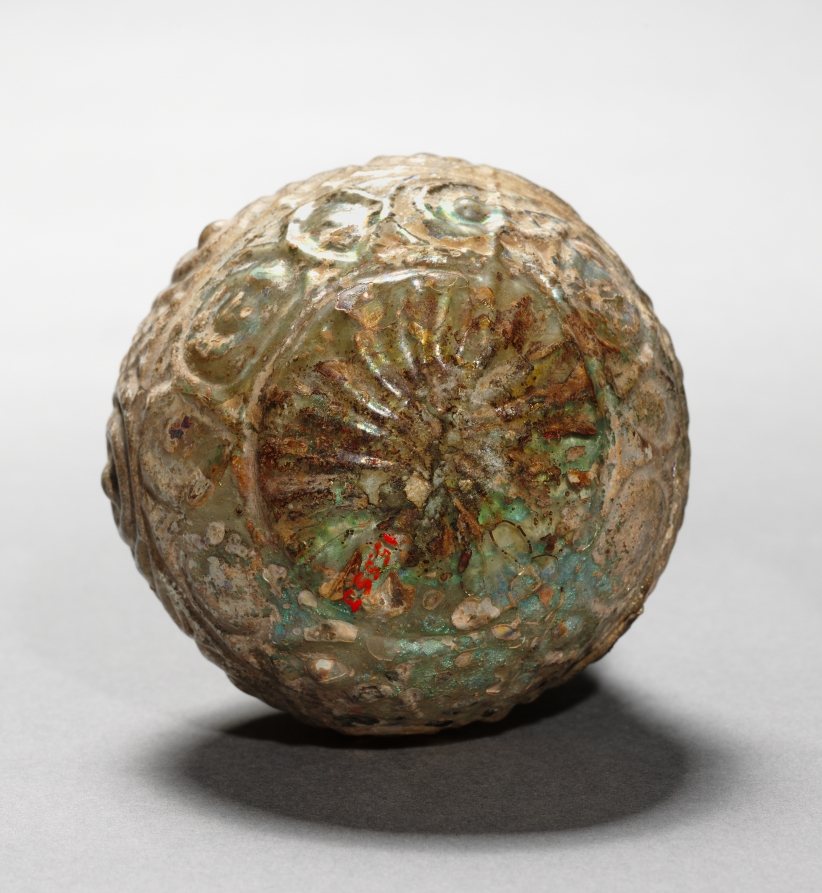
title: Pitcher with Handle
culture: Roman, Syro-Palestinian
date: 300s CE or later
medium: glass, mold-blown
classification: Glass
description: Featuring a globular mold-made body with three bands of geometric ornament (mostly concentric circles) in low relief, this pitcher could have been used for pouring water, wine, or other liquids. The separately made handle, decorated with four vertical ribs, is attached below the wide mouth by means of a coil.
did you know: Even the underside of this pitcher’s base is decorated, with a mold-made sunburst pattern.